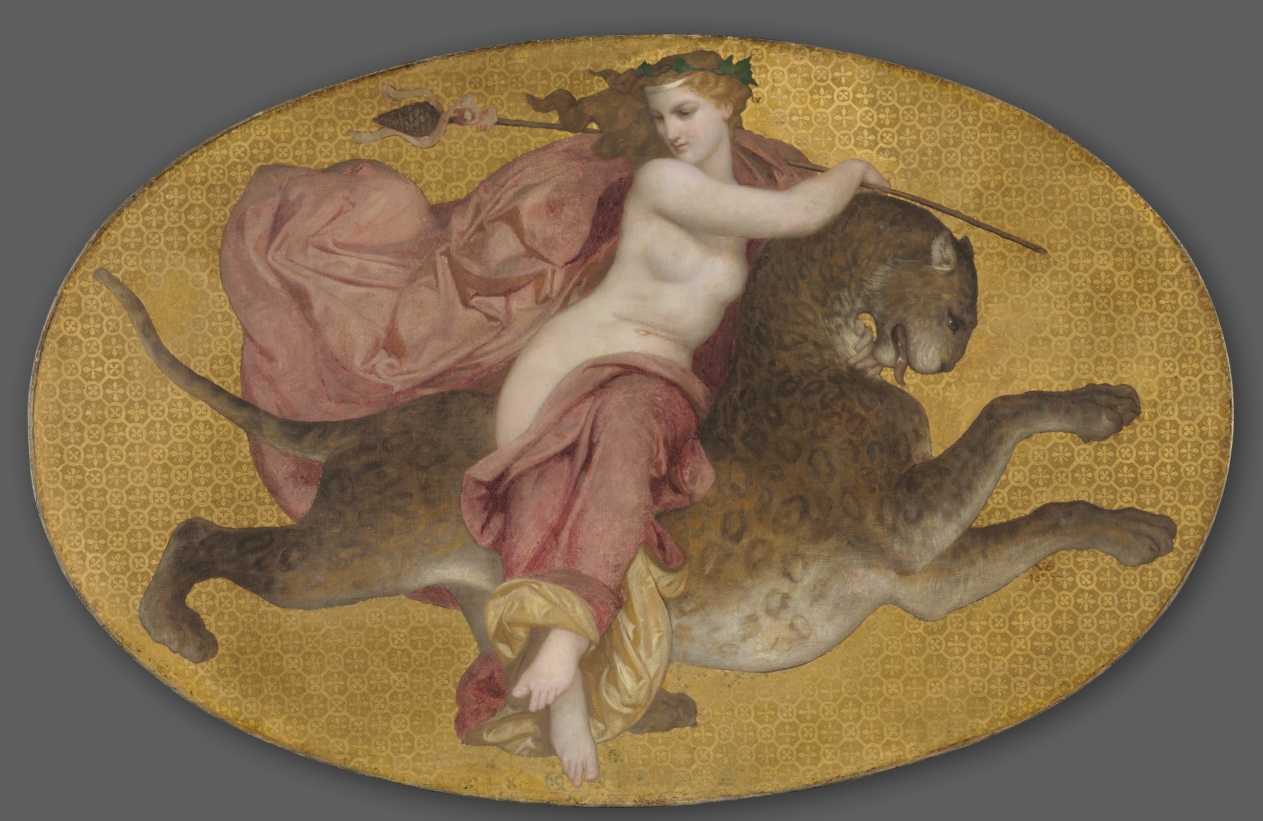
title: Bacchante on a Panther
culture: France, 19th century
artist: William Adolphe Bouguereau (French, 1825–1905)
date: 1855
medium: oil on fabric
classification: Painting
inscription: Signed in red-brown paint lower right: wb [in monogram] / 1855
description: Part of a series of six paintings that decorated Etienne Bartholony's house in Paris, these paintings emulate ancient Roman designs. Crisp, cut out forms are set against a gold background painted in imitation of mosaic. Arion was an ancient Greek poet who escaped death by riding away on the back of a sea creature who had been attracted by the poet's song. In the companion picture, a bacchante—a female worshipper of the wine god Bacchus—rides on a panther, the god's symbolic animal. These works were shown at the 1857 Paris Salon exhibition.